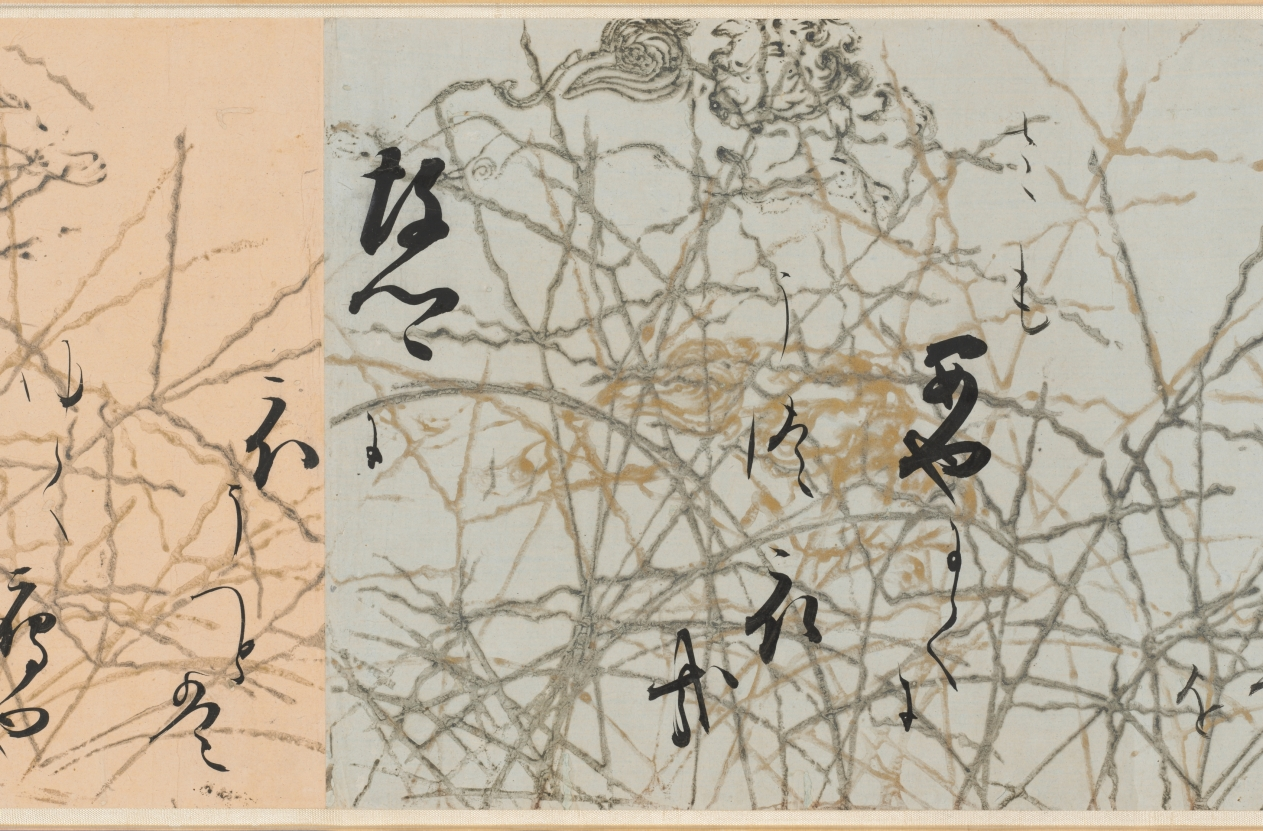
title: Selections from the New Collection of Japanese Poems from Ancient and Modern Times (Shinkokin wakashū) with Printed Designs of Chinese Lions and Crab Finger Grass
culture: Japan, Edo period (1615–1868)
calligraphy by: Hon'ami Kōetsu (Japanese, 1558–1637)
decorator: Tawaraya Sōtatsu (Japanese, c. 1570–c. 1640)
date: early 1600s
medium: handscroll; ink, gold, and silver on paper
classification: Calligraphy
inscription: Seal: 光悦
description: Hon’ami Kōetsu was a calligrapher and craftsman who frequently collaborated with the painter Tawaraya Sōtatsu, considered the first master of the Rinpa school. Kōetsu brushed seven poems from the autumn section of a poetry anthology onto dyed paper with motifs designed and printed in gold and silver by Sōtatsu.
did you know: Before becoming a master painter of screens, Tawaraya Sōtatsu painted fans.